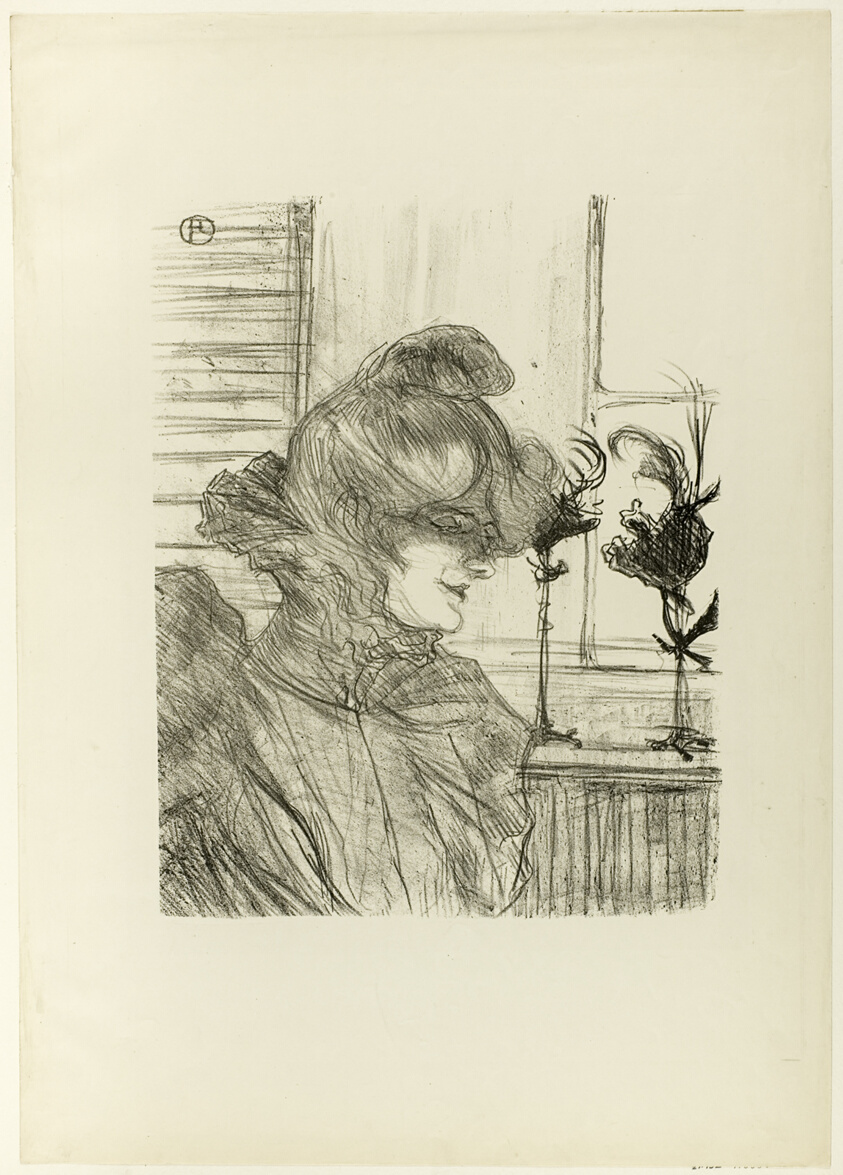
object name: Print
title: Le Margoin (Mademoiselle Louise Blouet)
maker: Henri de Toulouse-Lautrec (French, 1864-1901)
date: 1900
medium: Lithograph on cream wove paper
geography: France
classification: lithograph; print; prints and drawing